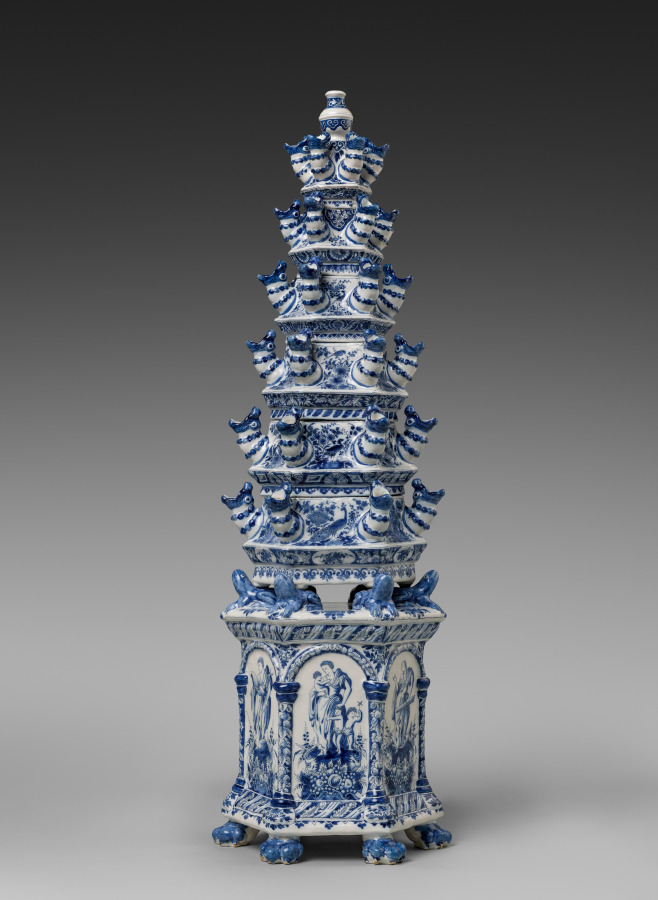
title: Flower Pyramid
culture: Netherlands, Holland, Delft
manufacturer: Adrianus Kocx (Dutch, active 1686–1701)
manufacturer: De Grieksche A (The Greek A) Factory (Netherlands, 1658–1811)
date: c. 1690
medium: Tin-glazed earthenware, painted in blue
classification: Ceramic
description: Allegorical figures representing Faith, Hope, and Love decorate the base of this pyramid, on which rest six tiers with spouts where flowers can be placed. Flower pyramids are among the most complex and luxurious types of ceramics produced in Delft in the late 1600s. This example was made in the Greek A Factory, owned by Adrianus Kocx. During his tenure, the factory became the most prestigious of Delft potteries and received commissions from Queen Mary II, who ruled over England, Scotland, and Ireland together with her husband, William III. She contributed to the international spread of the fashion for Delft ceramics.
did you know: The iconic blue-and-white ceramics from Delft originated as an attempt to copy Chinese porcelain.